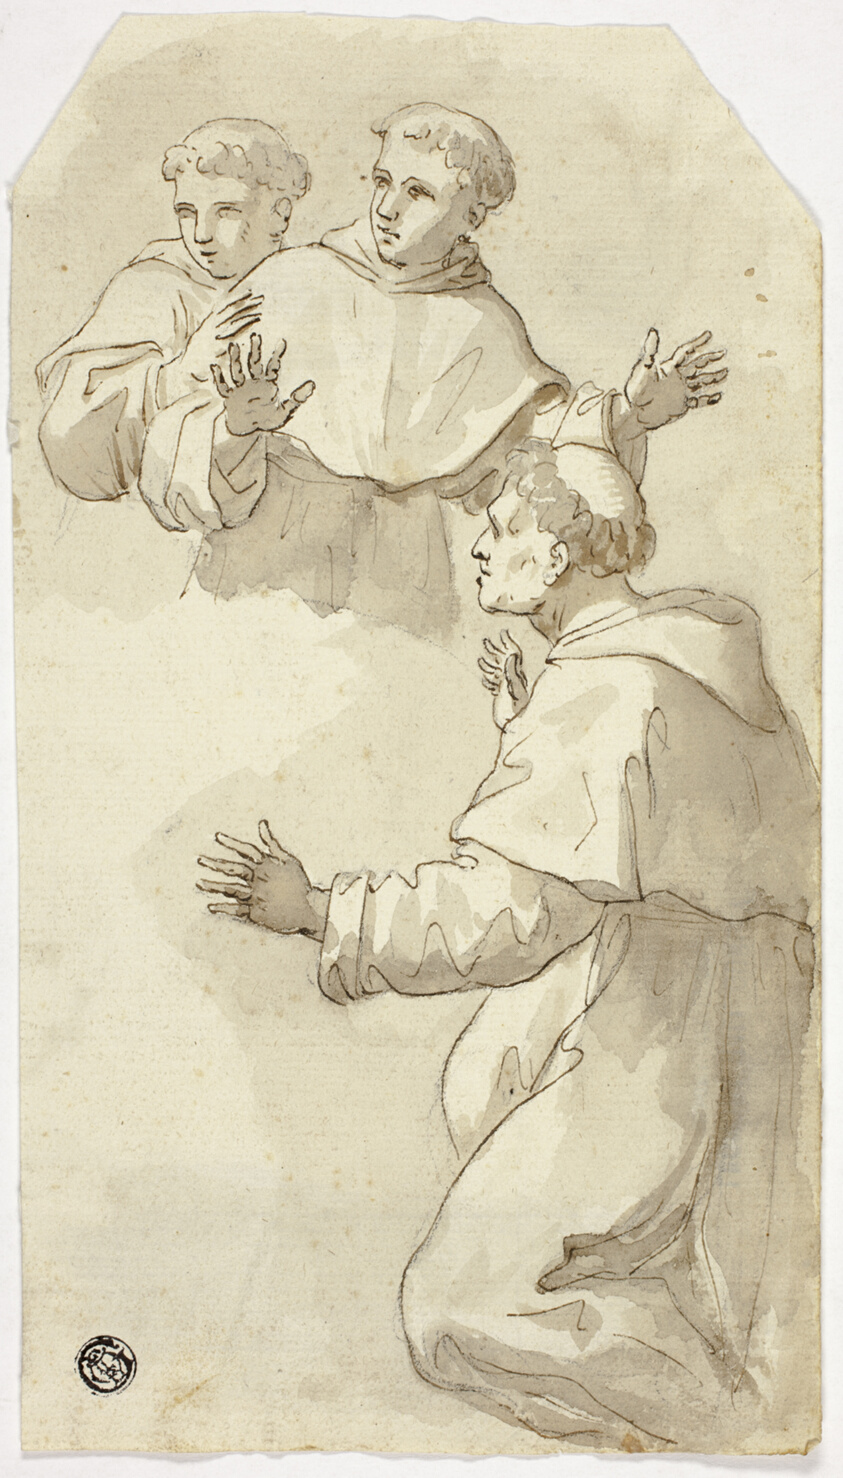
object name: Drawing and Watercolor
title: Three Startled Monks, One Kneeling, Two Standing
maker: After Luca Giordano (Italian, 1632-1705); or Vincenzo Camuccini (Italian, 1771-1844)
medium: Pen and brown ink with brush and brown wash, over black chalk, on ivory laid paper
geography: Italy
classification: ink or chalk wash; drawings (visual works); prints and drawing